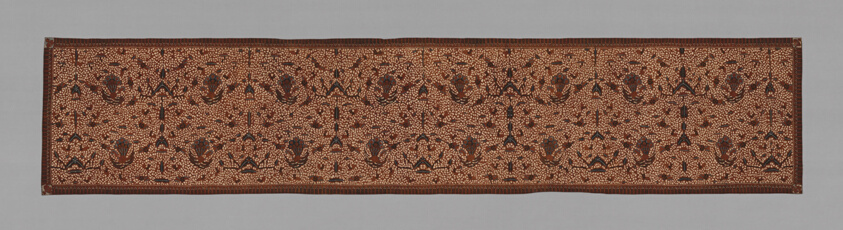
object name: Costume and Accessories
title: Iket (Headcloth)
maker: Indonesia, Central Java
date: 19th century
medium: Cotton, batik dyed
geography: Java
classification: textile; weaving; costume; dress (garment); clothing